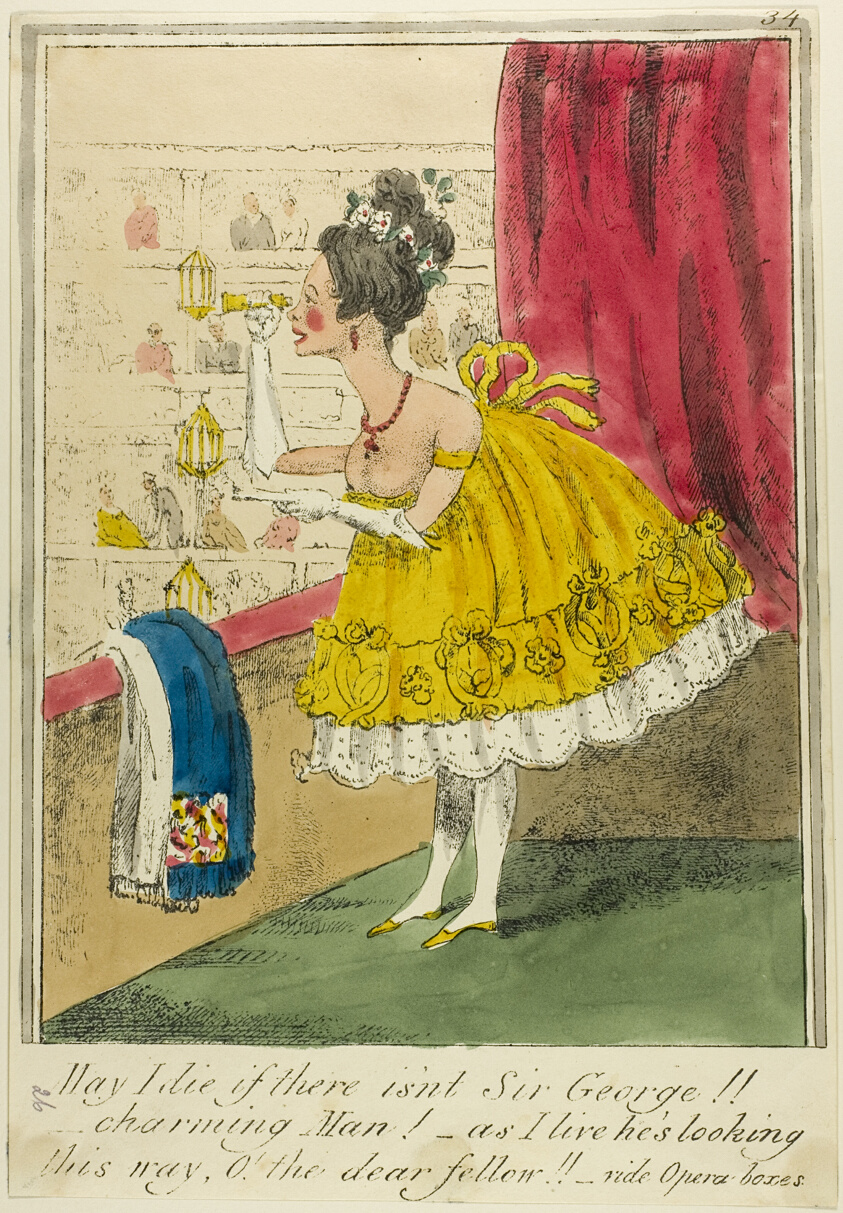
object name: Print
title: May I Die if There is'nt Sir George!!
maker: George Cruikshank (English, 1792-1878); published by S.W. Fores (English, 1761-1838)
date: published August 9, 1817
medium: Hand-colored etching on paper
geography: England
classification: etching; print; prints and drawing